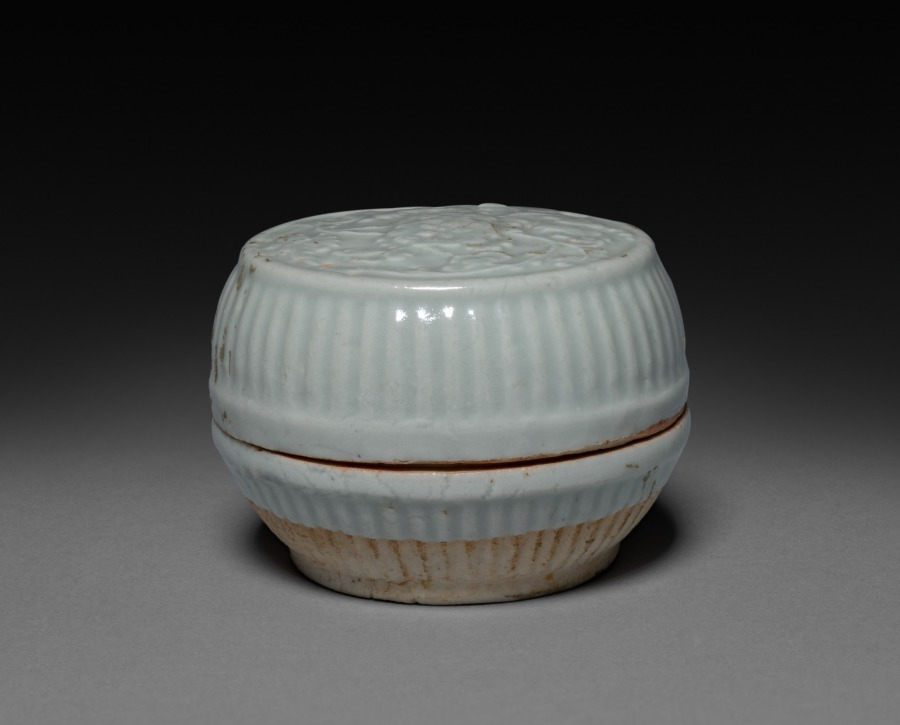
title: Circular Box: Qingbai Ware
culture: China, Southern Song Dynasty (1127-1279) - Yuan Dynasty (1271-1368)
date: 1200s-1300s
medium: glazed porcelain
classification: Ceramic